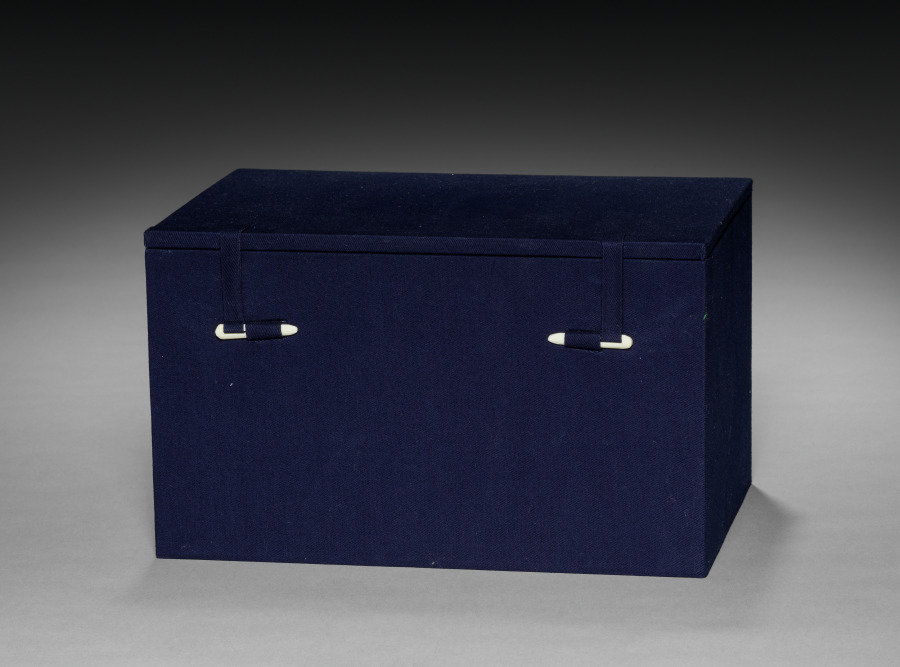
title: Lobed vase with underglaze cobalt blue decoration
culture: China, Jiangxi province, Jingdezhen kilns, Qing dynasty (1644-1911), Kangxi reign (1661-1722)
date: 1661–1722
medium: Porcelain with underglaze cobalt blue decoration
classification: Ceramic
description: Underglaze blue-and-white designs reached their highest painterly quality during the reign of the Kangxi emperor (1662–1722). Porcelain decorators achieved a level of artistic and technical sophistication that rivaled that of professional painters. Blue-and-white porcelains in brilliant cobalt blue catered to the taste of the educated class, the court, and foreign markets. Notice the blue-and-white porcelains in Pierre Bonnard’s painting Fruit and Fruit Dishes (CMA 2020.100); such ceramics on a French dining table would have been inspired by Chinese porcelains of this type.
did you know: The underside shows the mark of a feather, done in blue underglaze.